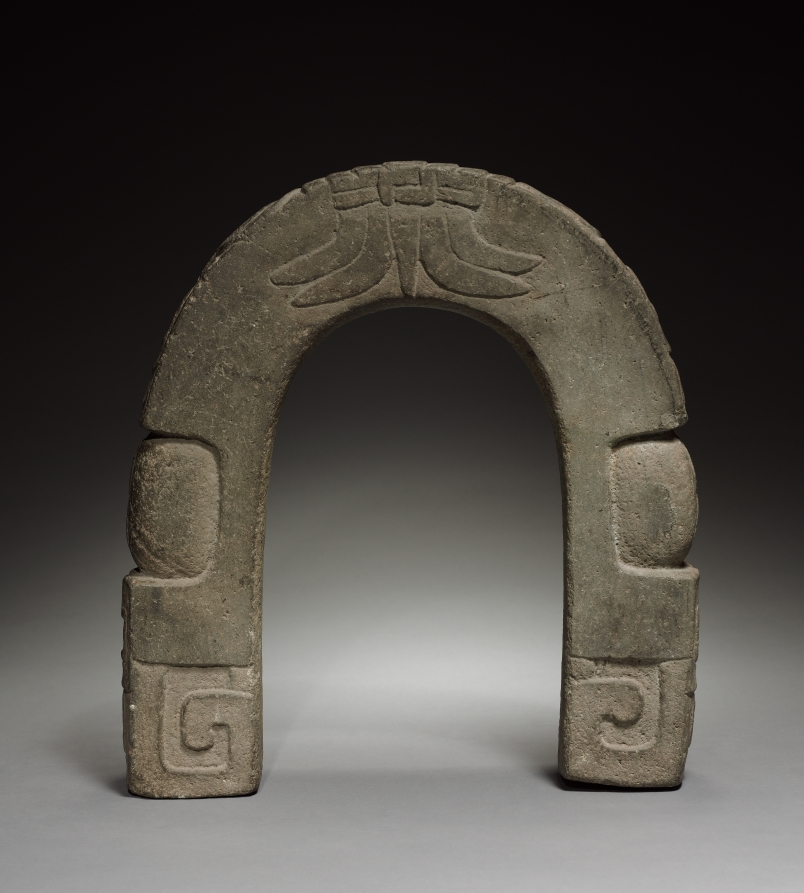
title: Yoke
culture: Mexico, Classic Veracruz Style, 7th-10th Century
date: c. 600–900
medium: stone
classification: Sculpture